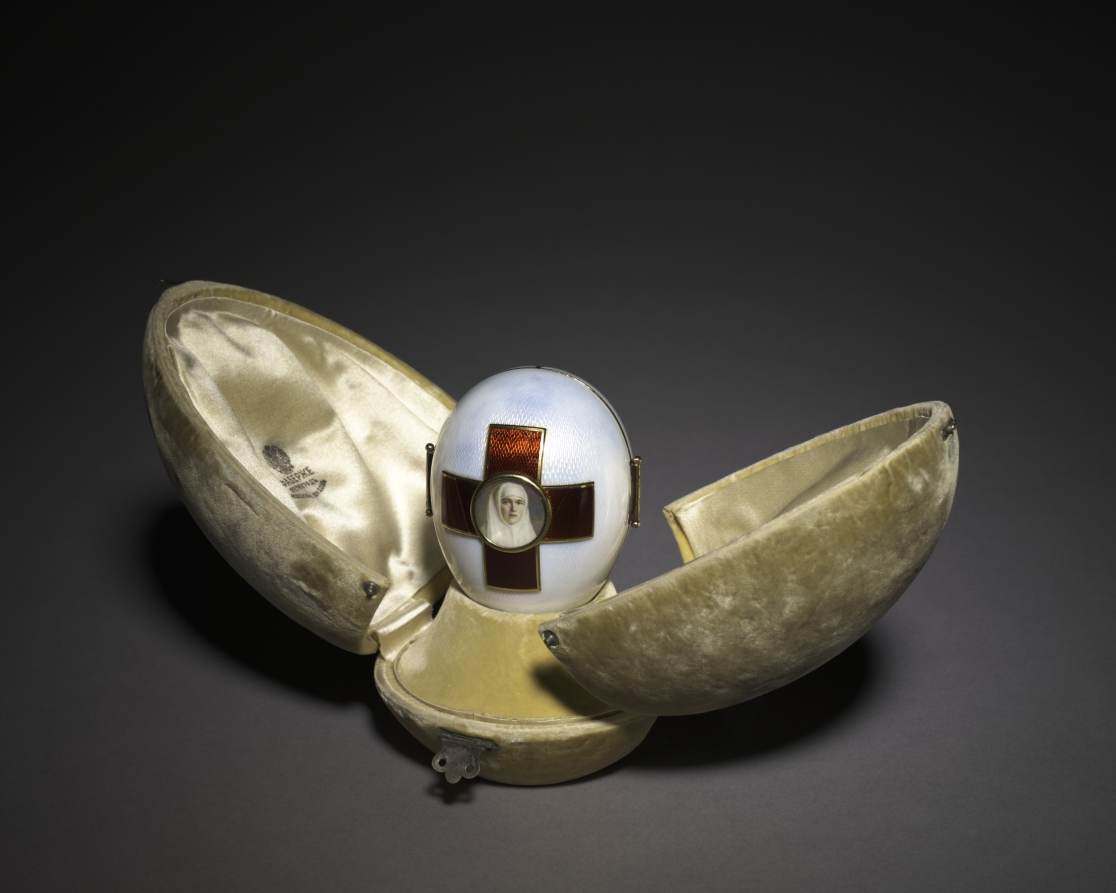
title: Imperial Red Cross Easter Egg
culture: Russia, St. Petersburg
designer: Peter Carl Fabergé (Russian, 1846–1920)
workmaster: Henrik Wigström (Russian, 1862–1923)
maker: House of Fabergé (Russian, 1842–1918)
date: 1915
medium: gold, silver gilt, enamel, glass, ivory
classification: Miscellaneous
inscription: inscribed on interior of egg: symbols for Alpha and Omega and imperial crown for Alexandra Feodorovna; 1915; inscriptions in Cyrillic, Old Church Slavonic, and Roman letters which identify Sts. Olga and Tatiana and presumably describe the central scene of the triptych.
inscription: Inscribed on silk velvet and satin lined case: double-headed eagle, Fabergé, Petersburg, Moscow, London (all in Cyrillic on lining of case); 17.559, abbreviation for "Red Cross" (in Cyrillic in red ink on outside of case).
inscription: Hallmarks: 72, Kokoshnik, lower case alpha in script [assay mark of St. Petersburg, 1908-26]; H.W. [initials of workmaster Henrik Wigström]; Fabergé (in Cyrillic).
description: The House of Fabergé made two imperial Easter eggs in 1915 that honored the contributions of Tsarina Alexandra and her two eldest daughters, Olga and Tatiana, to the war effort as Red Cross Sisters of Mercy. Compared to other Fabergé eggs elaborately ornamented with jewels, the eggs reflected the mood of austerity in Russia during World War I. This version becomes an icon when opened, revealing miniatures of the patron saints of the tsarina’s daughters. After the Russian Revolution, this relic of the Tsarist past was sold by the Soviet government to raise needed cash for the treasury.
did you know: This egg was confiscated by the Bolsheviks during the Russian Revolution and sold by the government of Josef Stalin in the 1930s to raise money for the Soviet treasury.